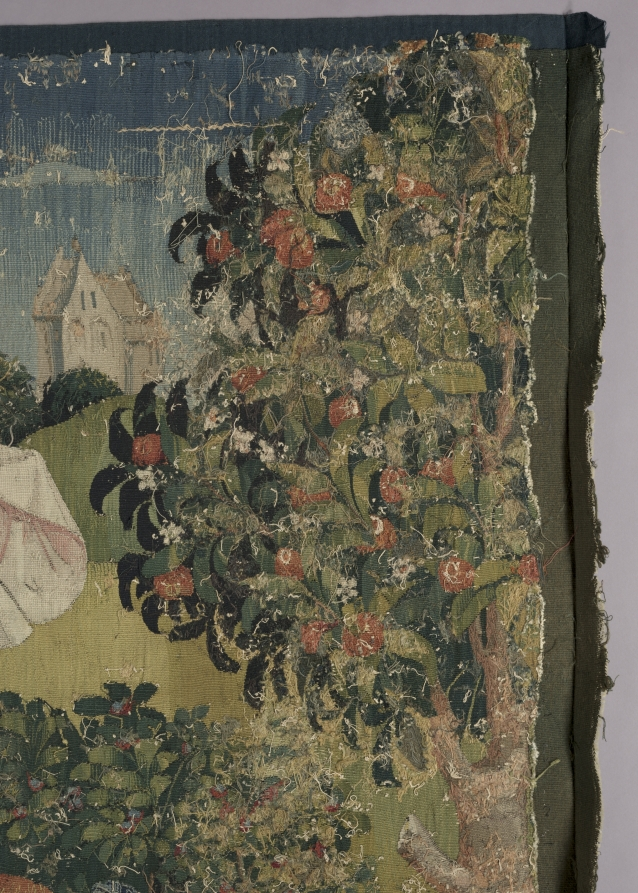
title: The Triumph of Eternity (from Chateau de Chaumont set)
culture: France, Lyon(?), early 16th century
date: 1512–15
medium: silk and wool; tapestry weave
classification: Tapestry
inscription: French verse in Gothic letters translates as follows: "Nothing triumphs by right authority, Unless it be conducted by Eternity. Nothing is permanent beneath the firmament, But above us triumphs Eternity."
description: The Triumph of Eternity is represented by the Coronation of the Virgin. Dressed in crimson velvet with an opulent brocaded velvet shawl, the Virgin is seated in the center as two angels hold a crown over her head. Five musical angels surround her playing an organ, recorder, straight cornetto, harp, and lute, while another sings from an open music book. The scenes in the set display a conservative style in which the figures are placed in shallow landscapes, thereby ignoring pictorial innovations for depicting space and mass. The verse in Old French at the top states: Nothing triumphing by due authority Remains permanent and durable. Nothing is permanent under the heavens, But above, eternity triumphs.